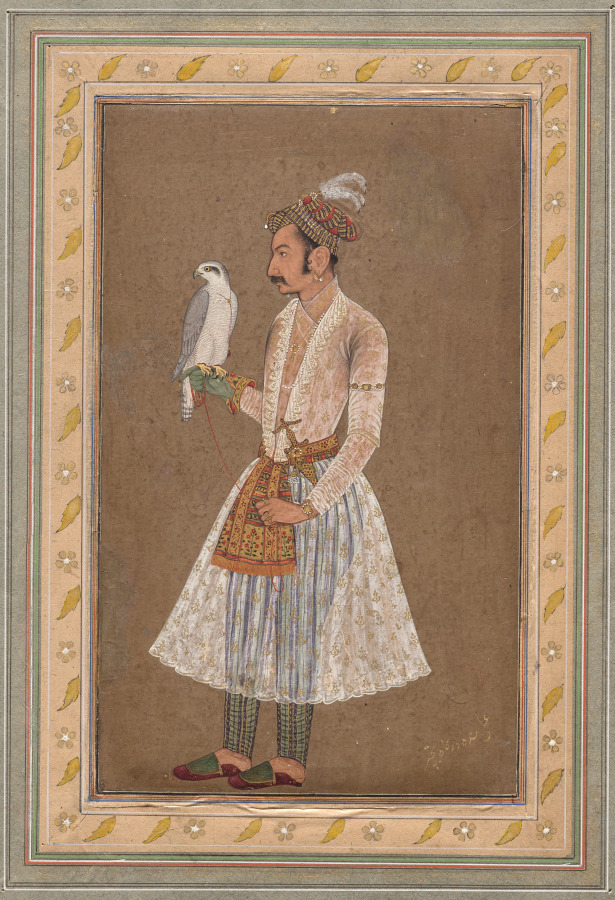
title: Portrait of Raja Jagat Singh of Nurpur (reigned 1618–46)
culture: Mughal India, Court of Jahangir (reigned 1605 - 27), possibly Lahore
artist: attributed to Bichitr (Indian, active c. 1615–50)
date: probably 1619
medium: Gum tempera and gold on paper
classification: Painting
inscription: ascription in lower right corner: amal - i bandieh dargah Bichitr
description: Jagat Singh was a prince from a small kingdom in the western Himalayan foothills who grew up at the imperial Mughal court of Jahangir and his queen Nur Jahan. He was given the title of prince in 1619, and this painting may commemorate that event. Very few nobles from the hill states had positions at the Mughal court at this time, so his portrait is a rare imperial Mughal painting. The emperor and his favorite wife frequently visited Nurpur, named “City of Light” in their honor, to hunt and relax, and Prince Jagat Singh was a favorite of the queen. She interceded on his behalf in 1624, when he joined a rebellion to dethrone her husband.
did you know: Jagat Singh, shown in this miniature, was a favorite of the Mughal queen.